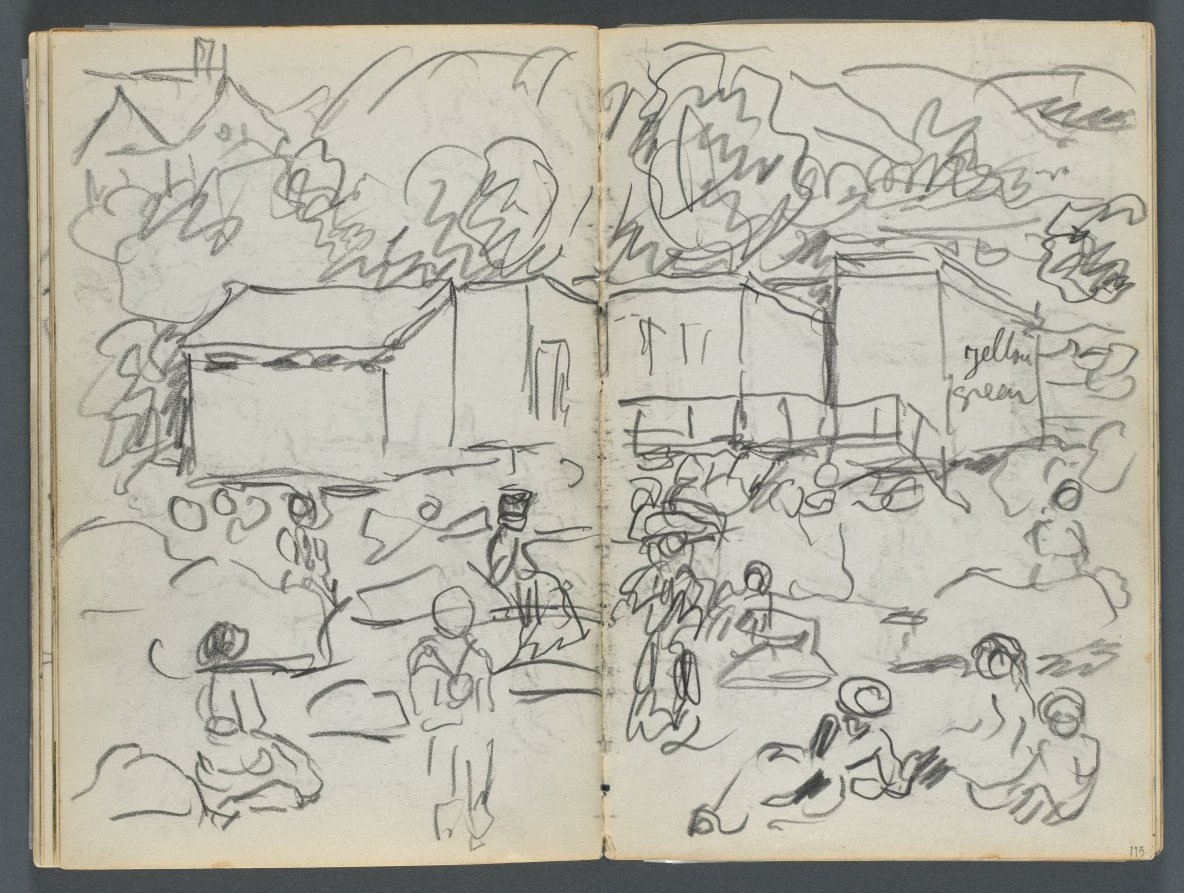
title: Sketchbook, The Dells, N° 127, page 114 & 115: Landscape with Figures and Buildings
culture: America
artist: Maurice Prendergast (American, born Newfoundland [now Canada], 1858–1924)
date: c. 1919–1921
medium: graphite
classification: Bound Volume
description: This sketchbook contains 59 pages of graphite drawings and 16 watercolors made at various locations on Cape Ann, Massachusetts.